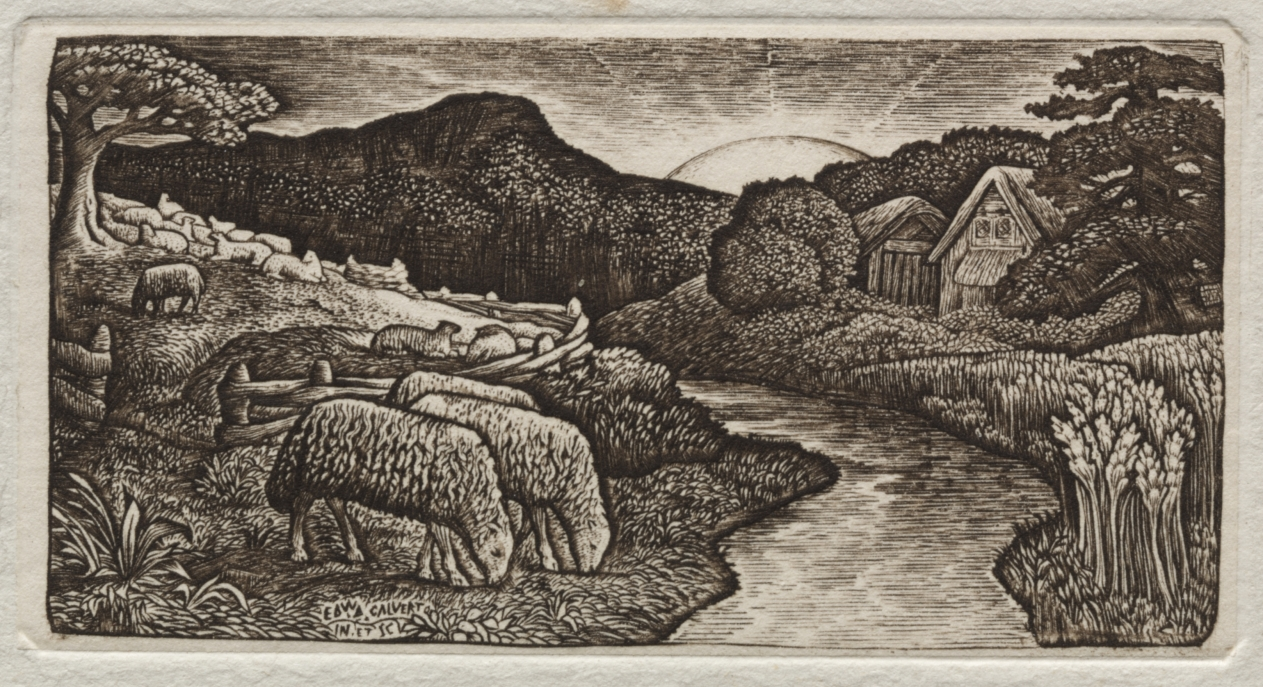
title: The Sheep of His Pasture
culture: England, 19th century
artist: Edward Calvert (British, 1799–1883)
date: 1828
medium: wood engraving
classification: Print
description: Calvert was so influenced by William Blake's wood engravings that The Sheep of His Pasture is directly based on an illustration for The Pastorals of Virgil. Calvert, however, even more than Blake, exploited the ability of wood engraving to achieve the most delicate detail, so astonishing in these miniatures. Calvert's subject matter originated from a vision of the golden age of pastoral innocence and abundance that has both Christian and classical overtones. The women in The Brook resemble figures carved on antique gems, and the tree stumps symbolize the transitory nature of life.